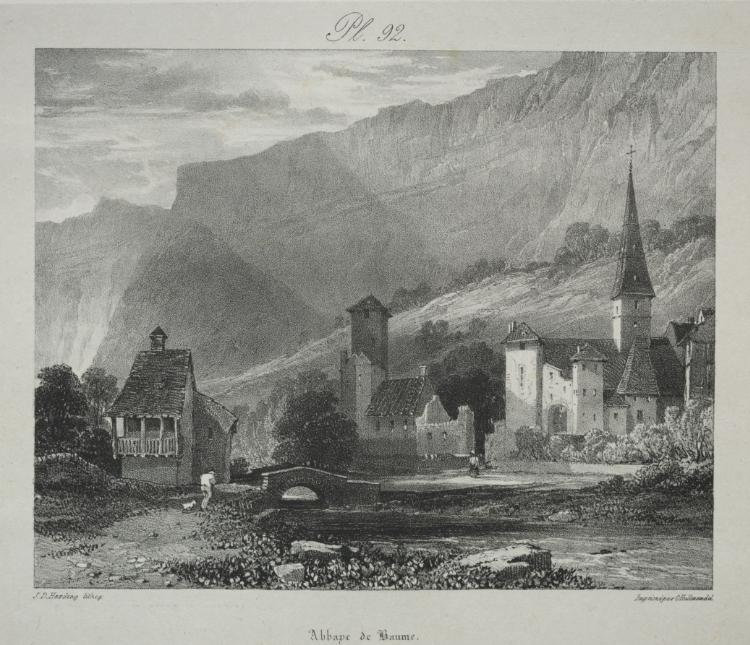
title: A Series of Subjects from the Works of the Late R. P. Bonington: A Study from Nature - Portrait of a Girl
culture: England, 19th century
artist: James Duffield Harding (British, 1798–1863)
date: 1829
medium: lithograph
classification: Print